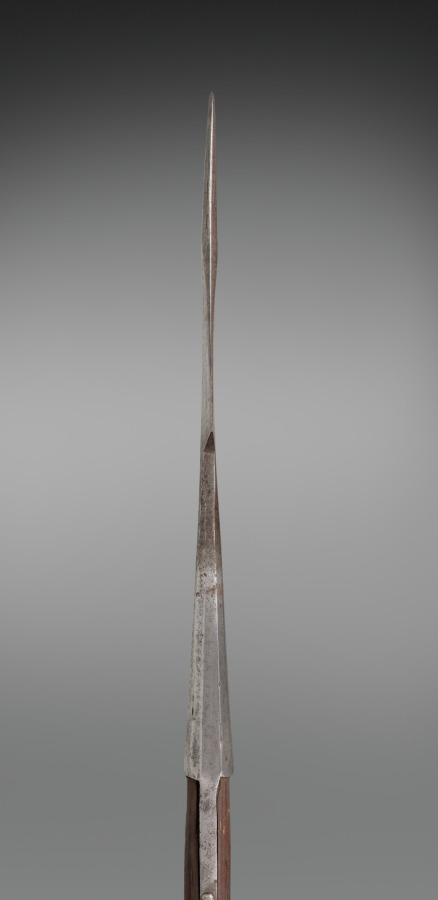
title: Banner with Royal Coat of Arms of Great Britian (pole)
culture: Great Britian, probably England, 18th century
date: 1700s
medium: wood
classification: Arms and Armor